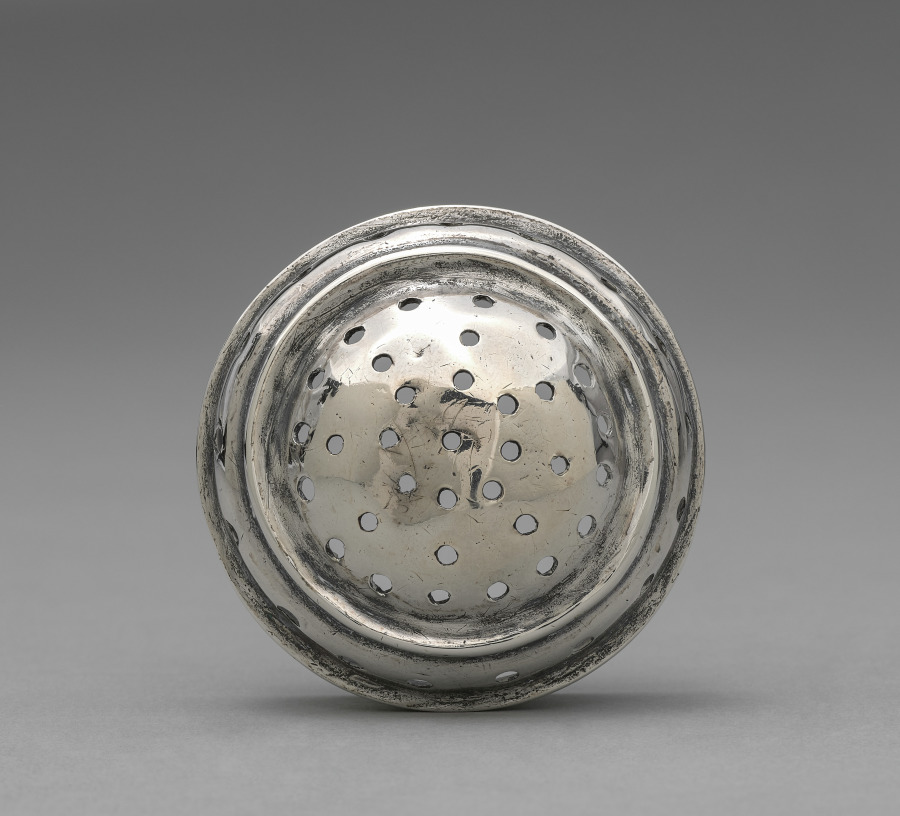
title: Caster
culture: America, Massachusetts, Boston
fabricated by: John Edwards (British)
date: c. 1715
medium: silver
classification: Silver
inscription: engraved "C" over "EE" in shaded block letters on bottom, and "FLB" (later) in bright-cut script on front, opposite handle.